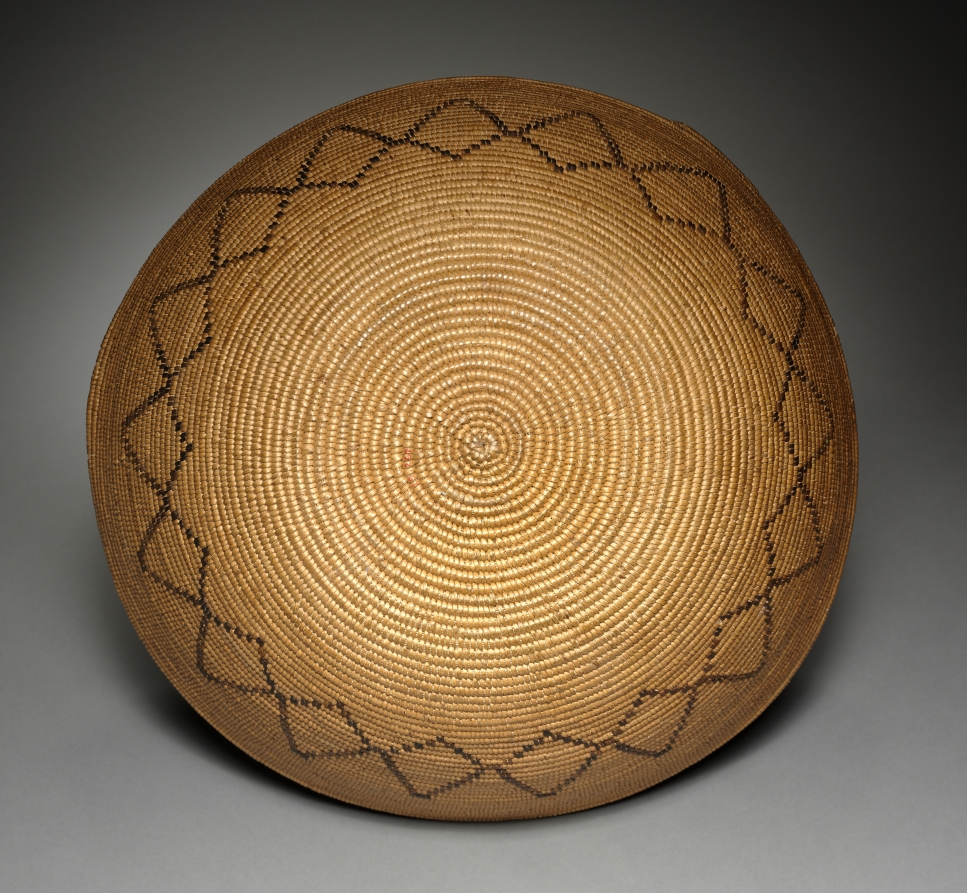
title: Bowl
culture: California, Southern, Gabrielino (San Gabriel, Mission or Tongva), Late 19th- Early 20th century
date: c 1875– 1925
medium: coiled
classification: Basketry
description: CMA Bulletin, December 1930